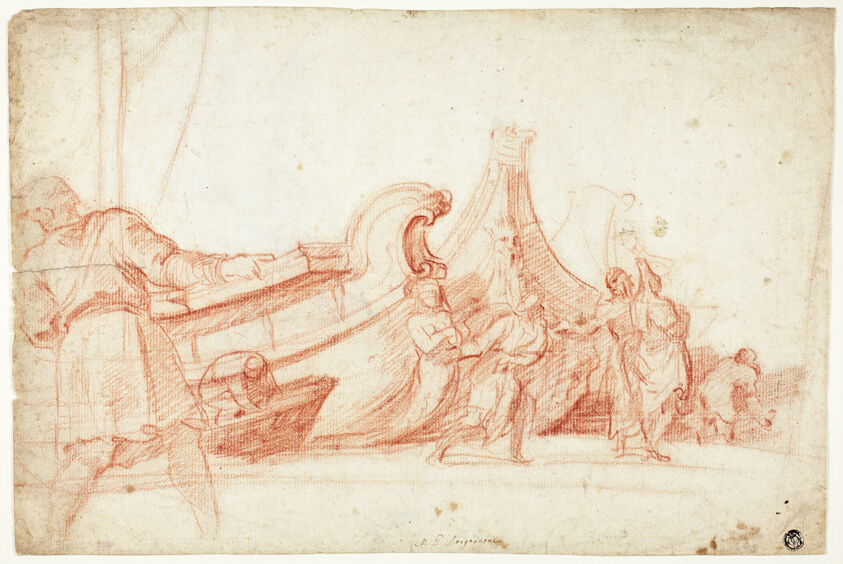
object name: Drawing and Watercolor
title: Dock Scene (recto); Two Sketches of Male Figures (verso)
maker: Guillaume Courtois (French, 1628-1679, active in Italy)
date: 1660/64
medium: Red chalk, on ivory laid paper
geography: France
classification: drawings (visual works); prints and drawing